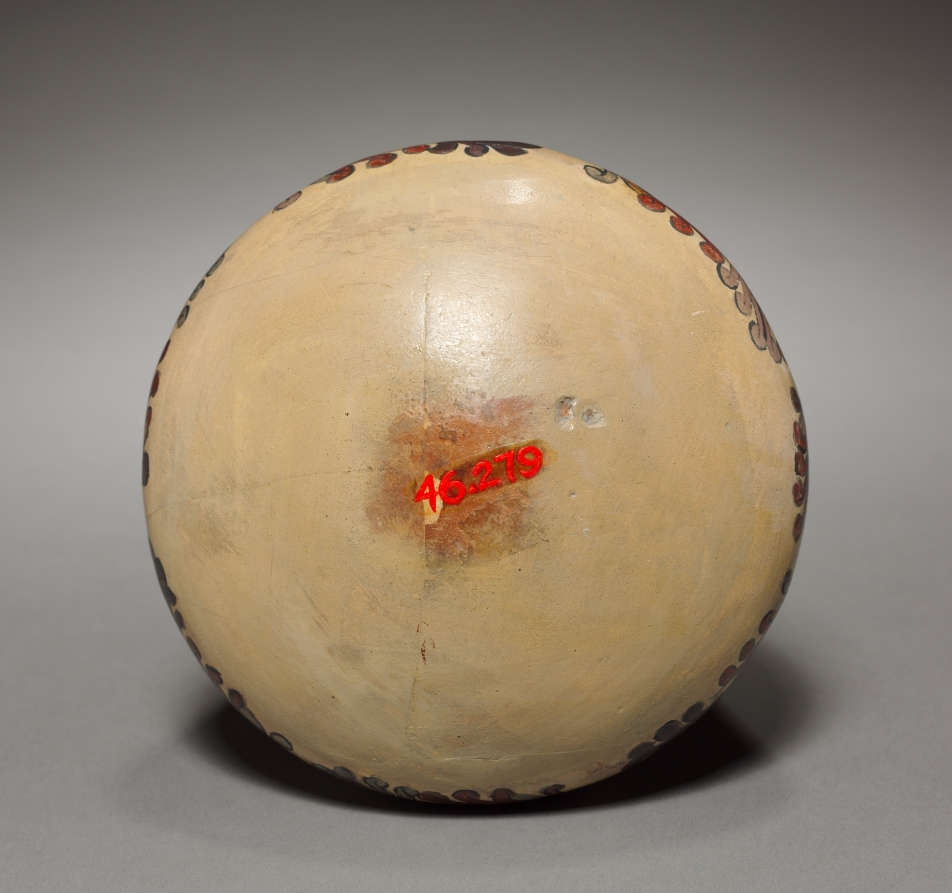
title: Vessel with Abstract Heads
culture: Peru, South Coast, Nasca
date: 100 BCE–700 CE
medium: earthenware with colored slips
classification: Ceramic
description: Late Nasca supernatural depictions became abstract, detailed, and focused on the head. In this vessel's central register, for instance, a deity is reduced to two mask-like faces, edged by volutes and linked by tongues; the only remains of a body are the hands. The lower register carries a similar image, and the upper register has severed human heads.